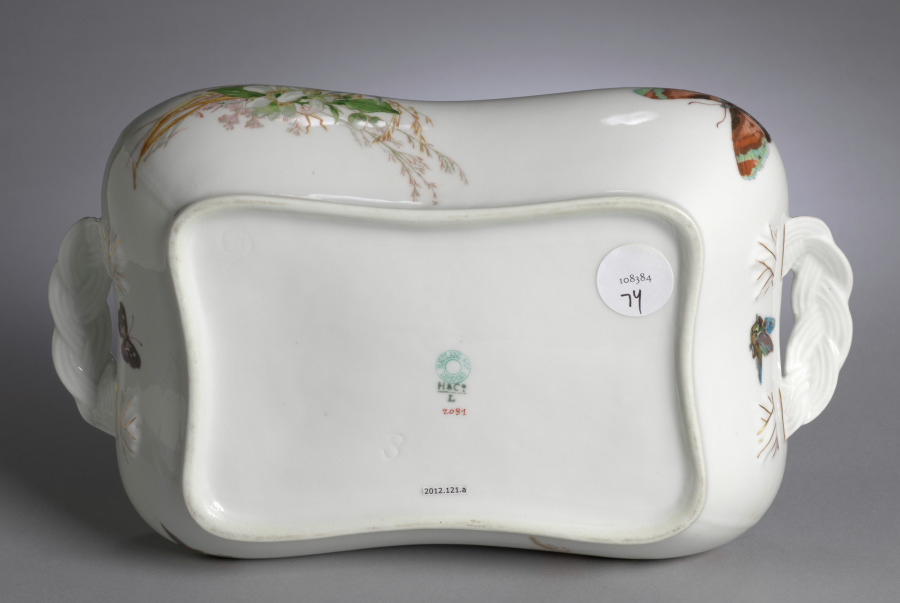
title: Vegetable Bowl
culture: France, Limoges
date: c. 1890–1910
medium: porcelain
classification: Ceramic